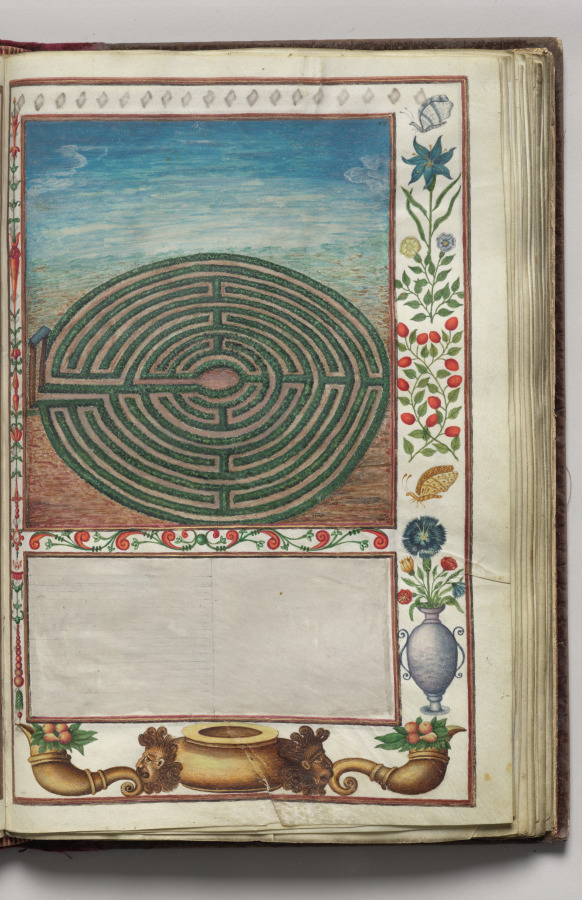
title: Labyrinth with Floral and Cornucopia Border, folio 16 (recto), from Florilegium (A Book of Flower Studies)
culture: France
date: 1608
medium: watercolor, ink, silver, and gold over occasional traces of pencil, on vellum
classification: Bound Volume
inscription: Dated: Poitiers 1608 (on frontispiece) Signed: On frontispiece in black ink, lower right: Van Kuyk Notation on drawing: Frontispiece: in pencil, lower margin: * élève de Van Kessel, peintre flammand (* in pencil also appears in front of Van Kuyk's name).